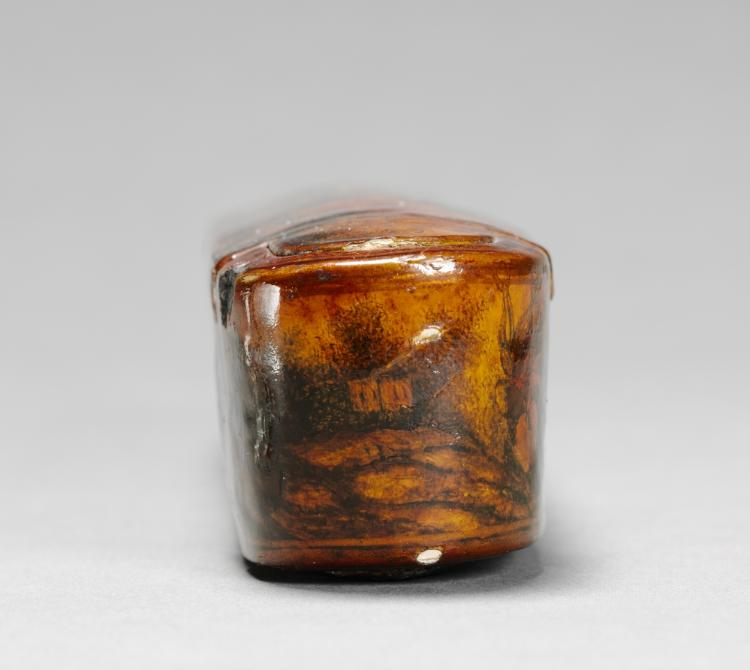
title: Pen and Ink Box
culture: Iran, probably Isfahan, Safavid period (1501–1722)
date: 1667–98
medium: Varnished lacquer and opaque watercolor over papier-mâché, ink, and copper alloy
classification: Lacquer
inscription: 1109